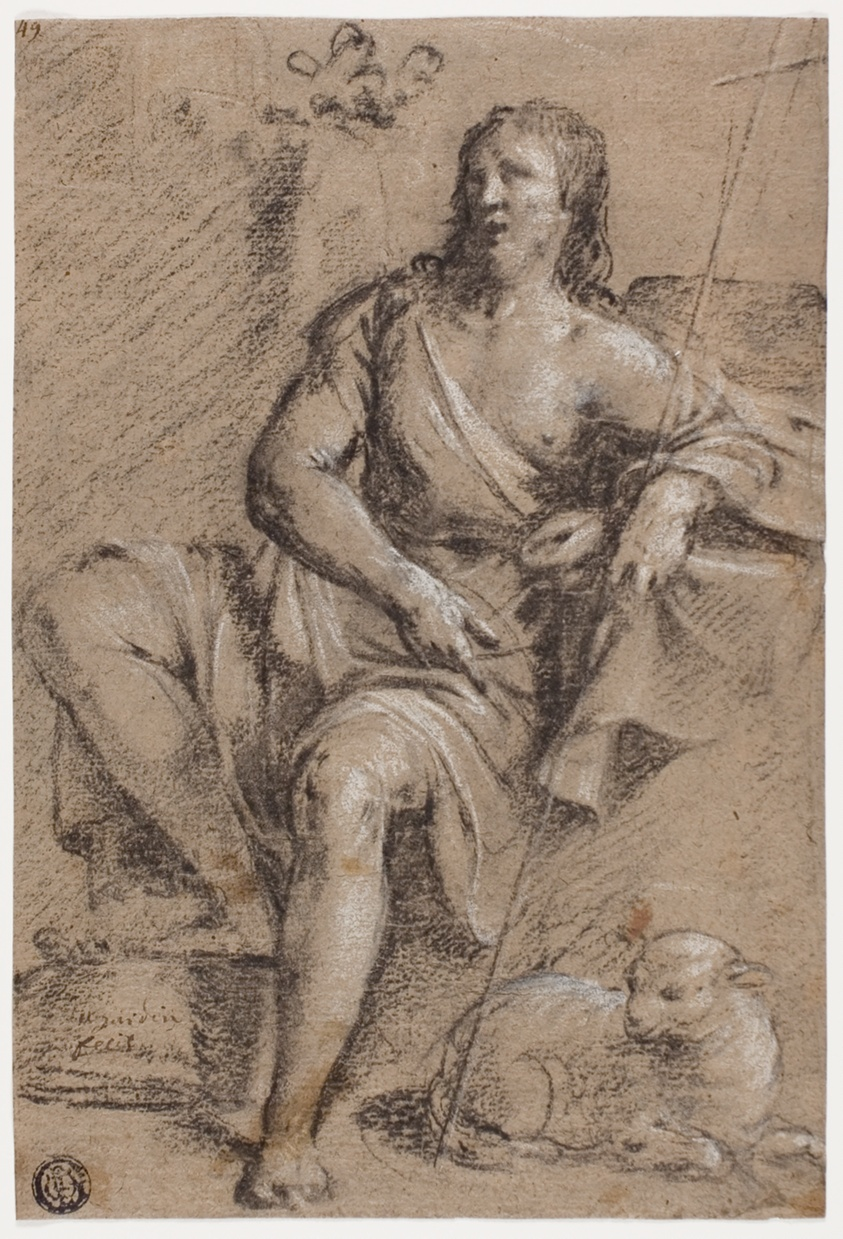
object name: Drawing and Watercolor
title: Saint John the Baptist or Christ the Good Shepherd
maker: Guy François (French, 1578-1650)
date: 1570/90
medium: Charcoal heightened with white gouache, on tan laid paper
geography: France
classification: charcoal; drawings (visual works); prints and drawing